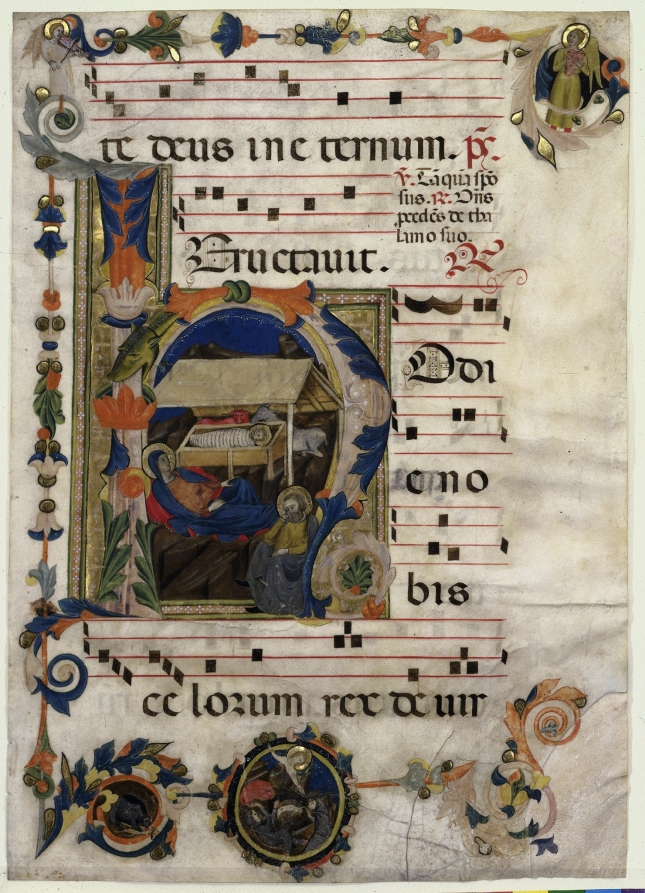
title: Leaf from an Antiphonary with Historiated Initial (H) with The Nativity (recto) and Music (verso)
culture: Italy, Tuscany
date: early 1300s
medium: ink, tempera, and gold on parchment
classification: Manuscript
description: This enormous initial h illustrates the beginning of the text of the first matins response for Christmas Day: Hodie nobis celorum rex (“On this day the King of Heaven”). The initial is appropriately decorated with a scene of Christ’s nativity. Along with other painters and illuminators, Neri da Rimini established the school of Rimini, characterized by a painting style owing much to the work of Giotto, who he perhaps encountered in Padua.